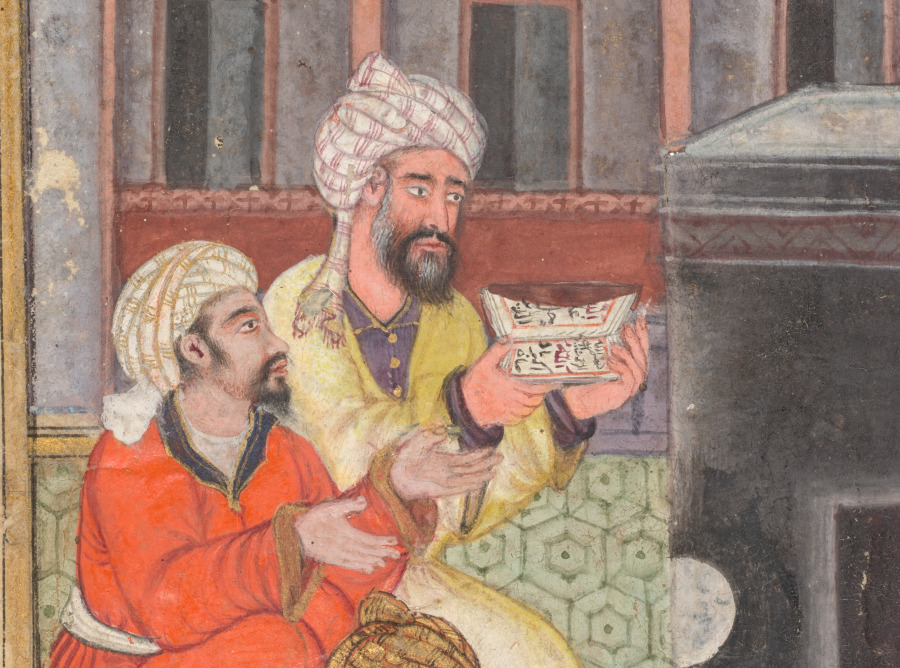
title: Page of disasters, from the Tarikh-i Alfi (History of a Thousand Years)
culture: India, Mughal school, 16th century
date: c. 1595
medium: Gum tempera, ink, and gold on paper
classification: Painting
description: A distinctive feature of this manuscript is the descriptive painting surrounding the blocks of text. At the top of this page is a depiction of the sacred center of Islam, the black stone structure called the Ka‘ba in Mecca that the Prophet Muhammad cleansed of pre-Muslim idols. The Ka‘ba is the endpoint of the Islamic pilgrimage that all Muslims are enjoined to make at least once during their lifetime. Remarkably, Akbar’s name appears on the page of the book held by a devotee, where only prayers or Qur'anic passages should be found. During the time of the caliph who persecuted Shi‘ites, Mecca experienced a drought. Fountains of water now were dry, and pilgrims had to buy water that was carried there.